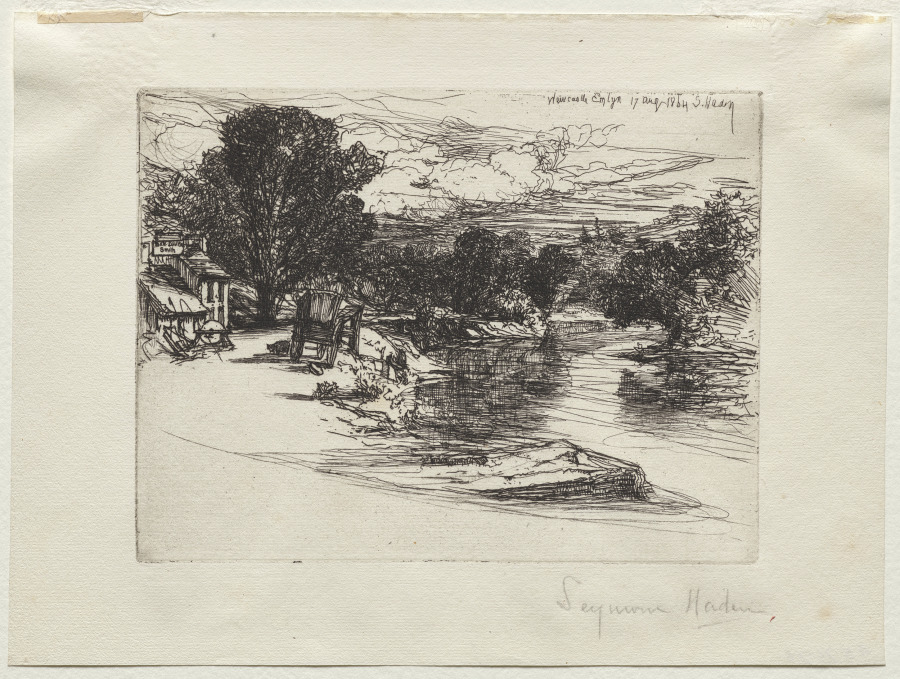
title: House of the Smith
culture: England, 19th century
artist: Francis Seymour Haden (British, 1818–1910)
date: 1864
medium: etching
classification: Print